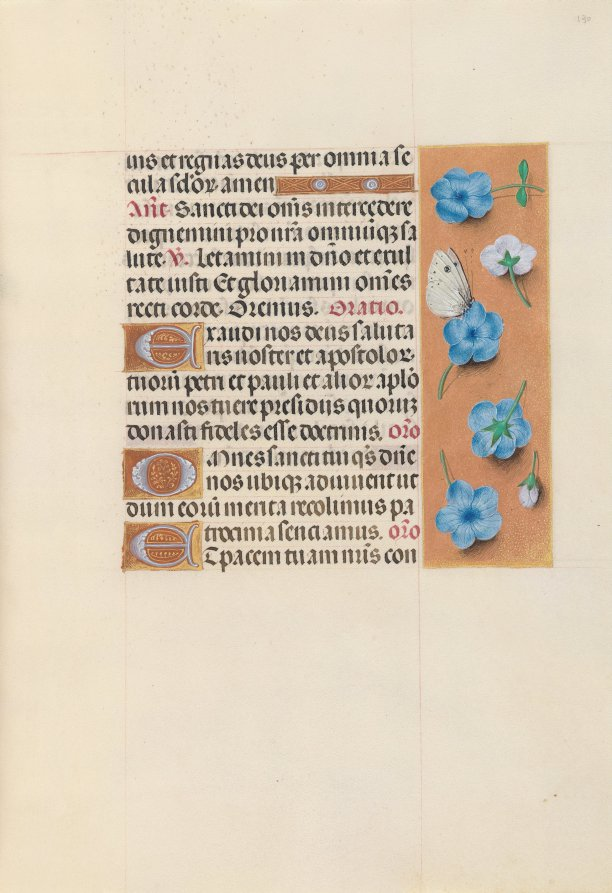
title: Hours of Queen Isabella the Catholic, Queen of Spain: Fol. 130r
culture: Flanders, Ghent and Bruges, late 15th century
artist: Master of the First Prayerbook of Maximillian (Flemish, c. 1444–1519)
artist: and Associates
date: c. 1500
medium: ink, tempera, and gold on vellum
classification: Bound Volume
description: This manuscript was illuminated by a circle of at least five highly organized manuscript painters active in the Flemish cities of Ghent and Bruges. The principal illuminator was Alexander Bening, who painted the majority of the book's miniatures. Manuscripts produced by this circle of artists are renowned for the decoration of their borders, which typically feature a rich variety of realistically-painted flowers, birds, and butterflies. This prayer book, called a book of hours, was intended not for a cleric, but for the private devotions of a lay person-in this case, Isabella the Catholic, Queen of Spain (1451-1504). Isabella's coat of arms embellishes the book's frontispiece. It is unlikely that the book was commissioned by the Queen herself; rather, she probably received it as a diplomatic gift from someone courting her patronage, perhaps Cardinal Francisco Jimenez de Cisneros. A Franciscan friar, Jimenez was dependent upon Isabella for his advancement, first to the post of Queen's confessor in 1492, and then to Archbishop of Toledo in 1495.